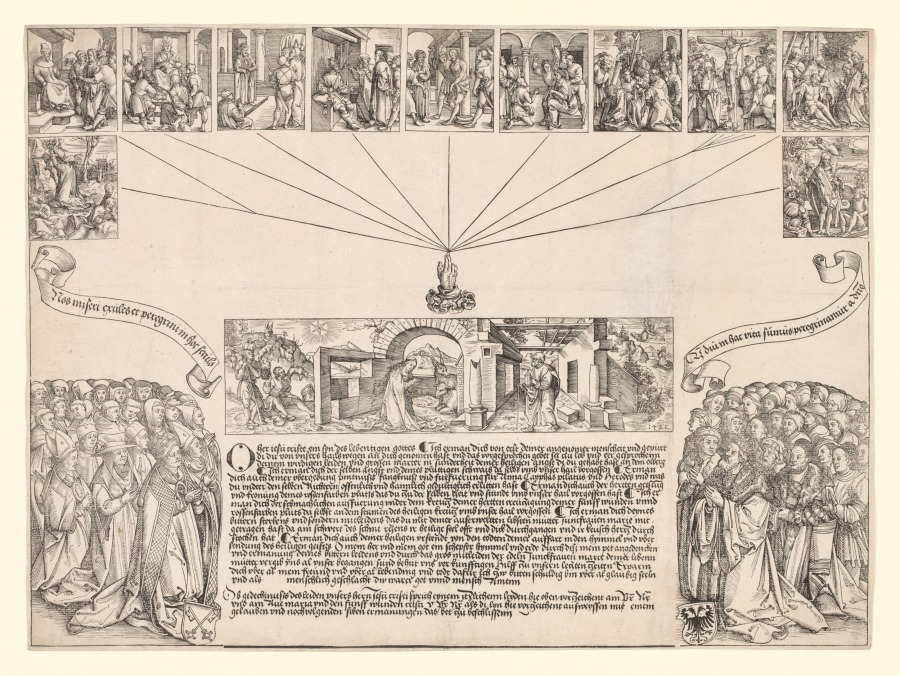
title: Nativity and Passion of Christ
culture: Germany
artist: Wolf Traut (German, c. 1486–1520)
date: 1511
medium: woodcut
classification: Print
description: Broadsheets, in which the images are accompanied by text, depict extraordinary happenings, omens, historical events, portraits, and traditional folktales. Nativity and Passion of Christ demonstrates clearly the practical function of broadsheets in a semi-literate society. The illustrations are placed around a German prayer which tells of Christ's birth and the redemption of mankind through his Passion. The Nativity with an Adoration of the Shepherds is represented in the center, above which a hand is shown indicating various scenes from the Passion of Christ, which would be pointed out as the prayer was recited. Members of the Christian estate are represented on either side: on the left is a group of ecclesiastics behind a figure of the Pope, and on the right a cluster of secular figures are assembled behind the Holy Roman emperor.